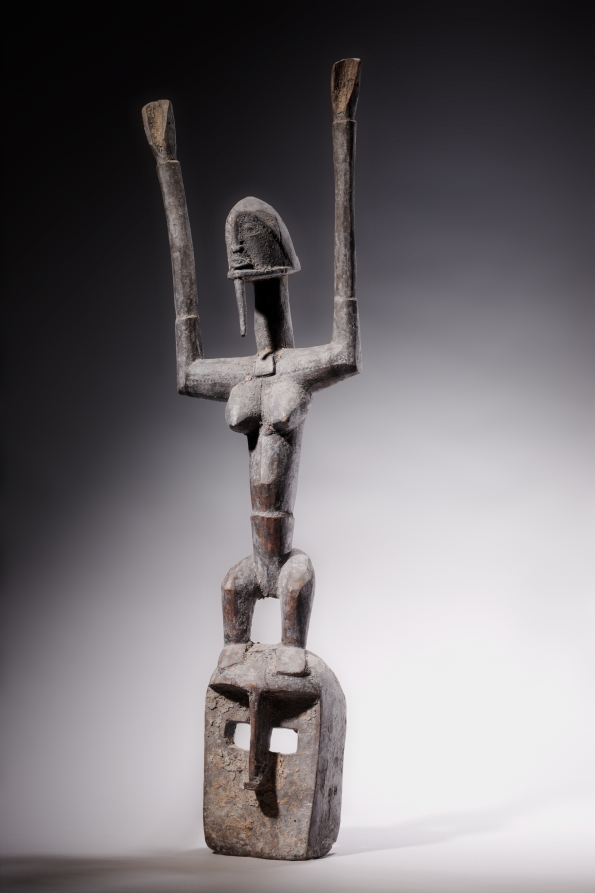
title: Face Mask with Female Figure (satimbe)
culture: Africa, West Africa, Mali, Dogon-style blacksmith-carver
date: early to mid-1900s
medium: Wood and organic materials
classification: Mask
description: Dogon masks are worn at the end-of-mourning ceremonies called dama. The masks incarnate ancestors, which can be human, animal, or vegetal. The female figure with raised arms topping this example represents the mythical character Yasigine, who played a key role in the very first sigi celebration. Held every 60 years, the sigi ceremony commemorates the arrival of death.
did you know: This mask is one of several hundred that may perform at the ceremony called dama.